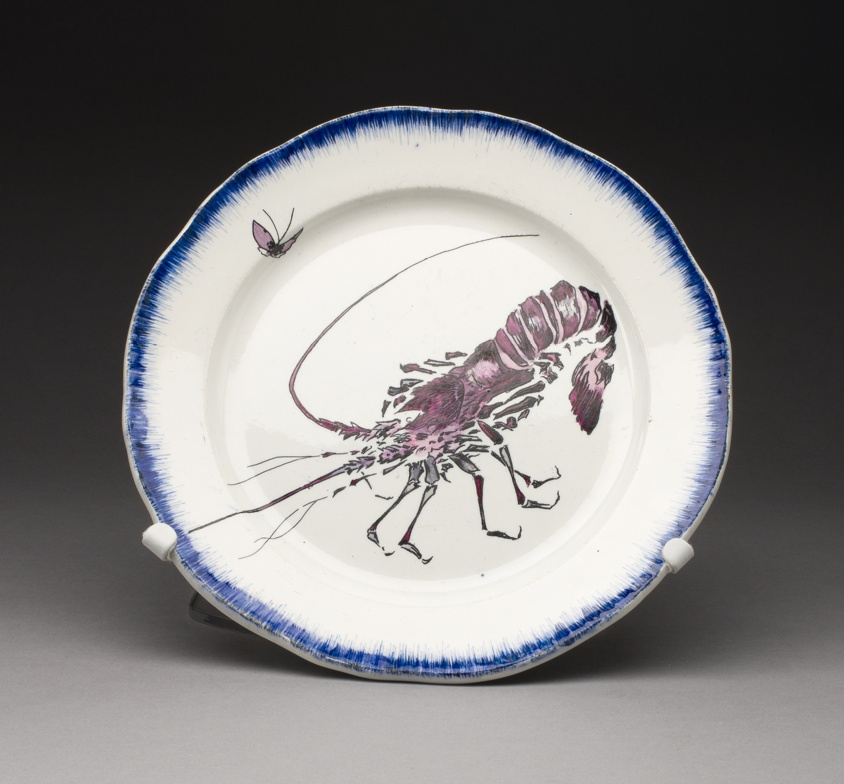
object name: Ceramics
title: Plate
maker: Designed by Félix Bracquemond (French, 1833-1914) for François-Eugène Rousseau (French, 1827-1891); Made by Creil et Montereau Manufactory (French, founded 1797)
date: 1866/75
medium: Tin-glazed earthenware, stenciled and enameled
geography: France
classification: plate (general, dish); dish (vessel); ceramics